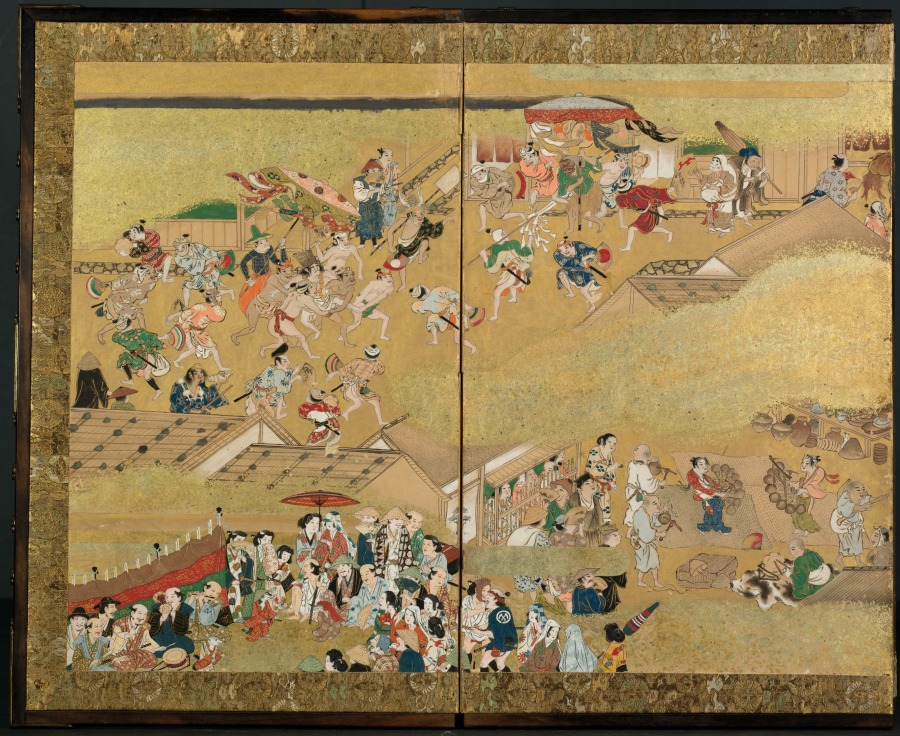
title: Festival Scenes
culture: Japan, Edo period (1615–1868)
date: 1600s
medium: One of a pair of six-panel folding screens; ink, color, gold, and gold leaf on paper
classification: Painting